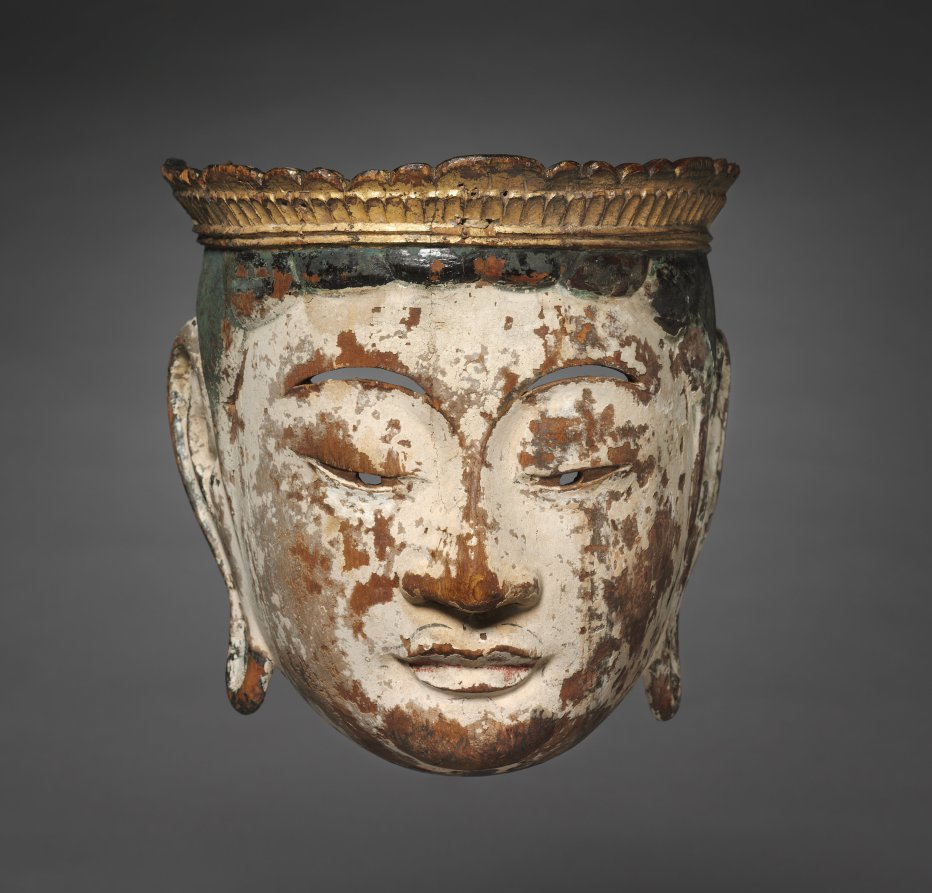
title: Processional Mask of a Bodhisattva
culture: Japan, Heian period (794–1185)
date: late 1100s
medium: wood, lacquered and painted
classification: Sculpture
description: This ceremonial mask was used in a dramatic enactment of the descent of the Buddha Amida and his entourage to welcome the dying to his Pure Land. The mask represents the face of an enlightened being called a bodhisattva. Performances of the welcoming descent had begun by the early 11th century and continue at some temples today.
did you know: The most famous welcoming descent procession happens each year on April 14 at the temple Taimadera in Nara.